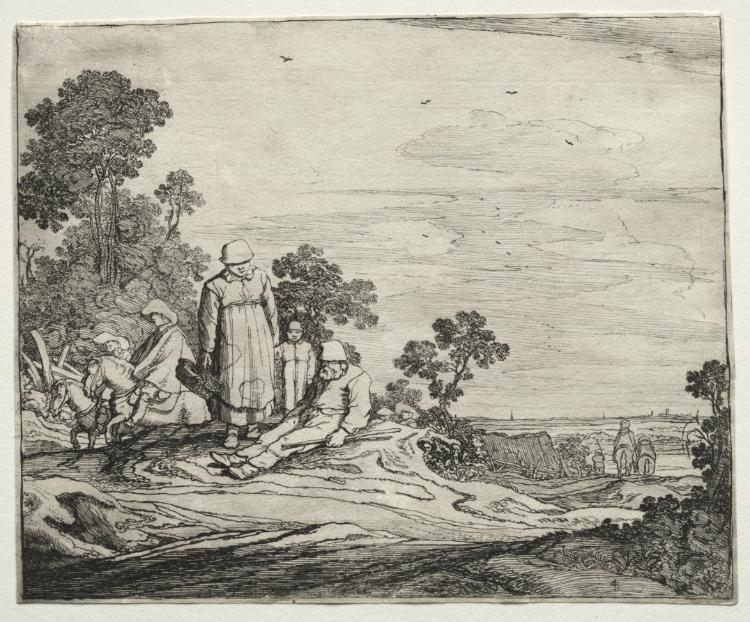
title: Landscape with Peasants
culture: Netherlands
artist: Pieter Molyn (Dutch, 1595–1661)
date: 1626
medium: etching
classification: Print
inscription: On plate, bottom right: "4"